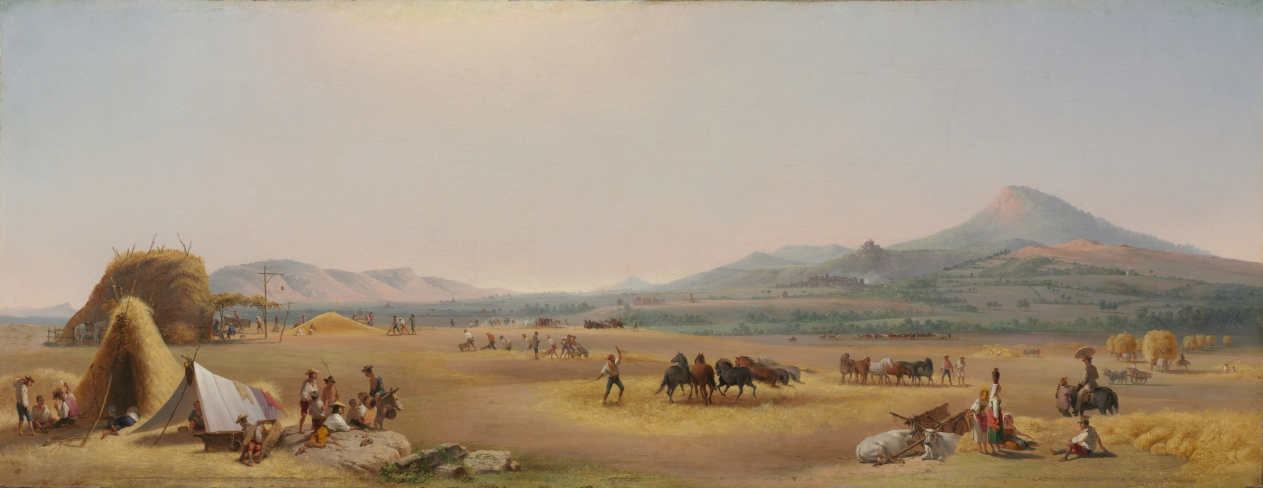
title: Harvest on the Roman Campagna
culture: America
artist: John Gadsby Chapman (American, 1808–1889)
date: 1868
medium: oil on canvas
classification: Painting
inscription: signed on the back: HARVEST ON THE ROMAN CAMPAGNA / FOR H. B. HURLBUT, ESQ. CLEVELAND, O. / BY John G. Chapman / Rome 1868